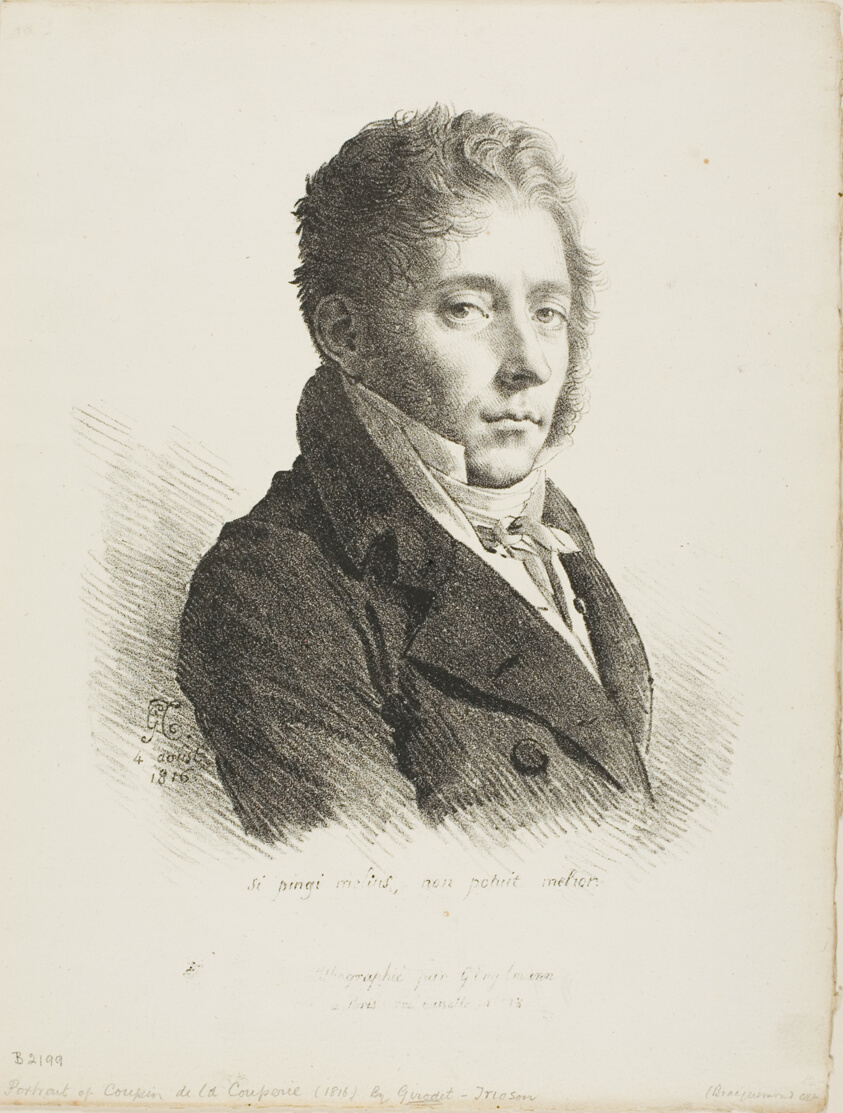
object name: Print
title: Portrait of Coupin de la Couperie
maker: Anne-Louis Girodet de Roucy-Trioson (French, 1767-1824); printed by Gottfried Engelmann (French, 1788-1839)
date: 1816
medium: Lithograph in black on ivory wove paper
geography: Paris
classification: lithograph; print; prints and drawing